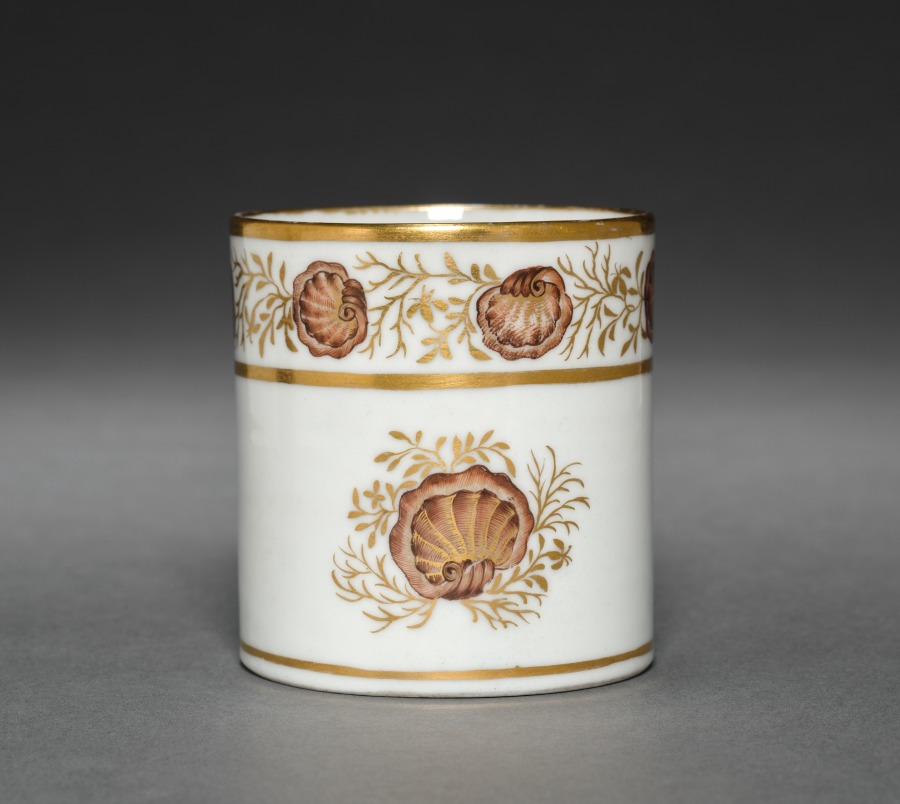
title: Cup from Oliver Wolcott, Jr. Tea Service (4 of 6)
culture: Chinese Export porcelain, late 18th-early 19th century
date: 1785–1805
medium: porcelain, sepia enamel, gold leaf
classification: Ceramic